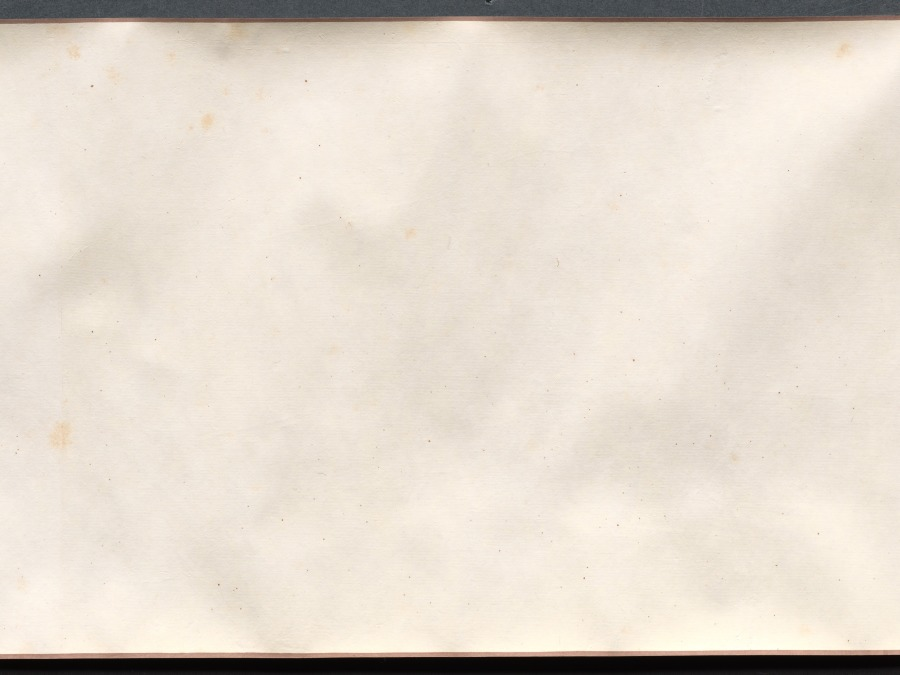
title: Four Poems: Calligraphy in Cursive Script (xingshu)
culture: China, Ming dynasty (1368–1644)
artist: Chen Jiru (Chinese, 1558–1639)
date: 1500s-1600s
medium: handscroll; ink on gold speckled paper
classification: Calligraphy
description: Written in graceful calligraphy with well-composed characters, the artist communicates his thoughts and state of mind in four poems. Characters written in dark, thick strokes convey rhythm, and indicate the moment after the writer had paused to recharge his brush with ink. Chen Jiru was a native of Huating (modern Shanghai). His calligraphy style resembles that of his friend, influential calligrapher Dong Qichang (1555–1636). Unlike Dong, Chen did not pursue government service: he burned his Confucian robes, declined a summons to serve at court, and immersed himself in literature, calligraphy, and painting.